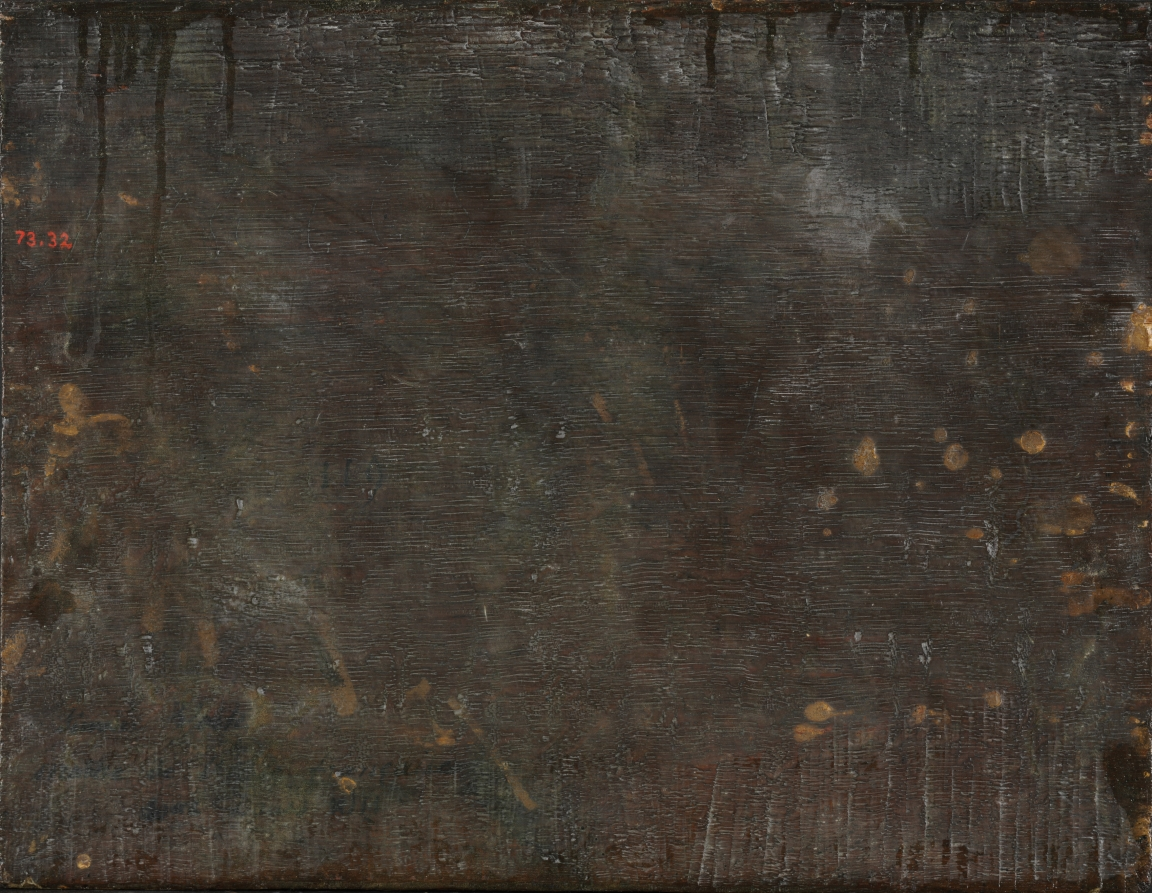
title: Rest on the Flight into Egypt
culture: France, 17th century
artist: Charles Poërson (French, 1609–1667)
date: c. 1640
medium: oil on wood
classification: Painting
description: Formerly ascribed to the French painter Simon Vouet (1590-1649), Rest on the Flight into Egypt has only recently been attributed to Poerson, a collaborator and follower of Vouet. Intended to be a small devotional picture, this painting on oak panel depicts a quiet scene of the Holy Family resting; the Virgin Mary sits while an angel brings the plump young Christ Child fruit, and St. Joseph leads their donkey away to graze. The delicate pinks and blues and the transparent treatment of light and shadow create a gentle domestic atmosphere, characteristic of Vouet's Italian-influenced work.